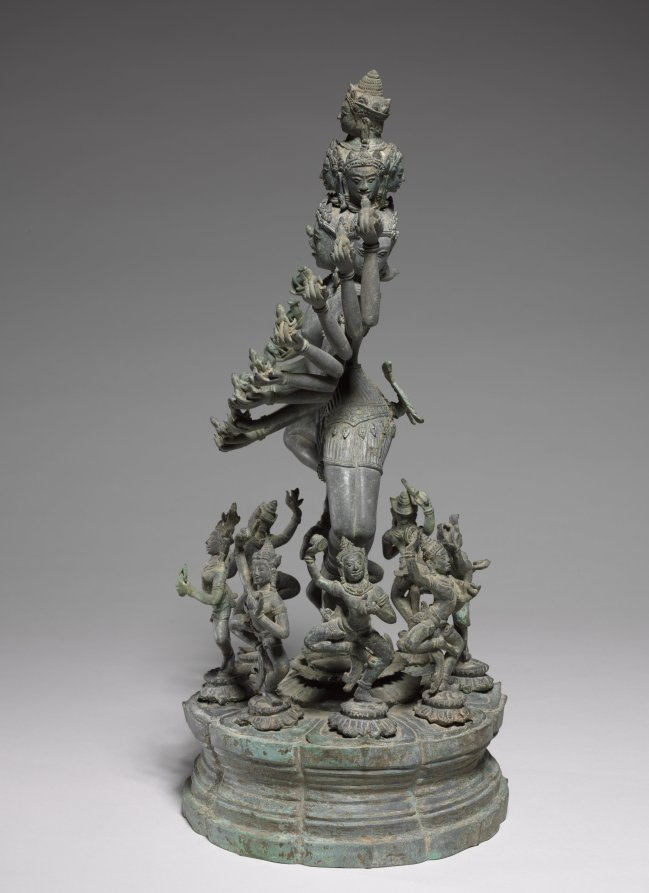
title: Hevajra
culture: Northeastern Thailand, former kingdom of Angkor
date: c. 1200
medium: Bronze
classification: Sculpture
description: Hevajra was an important figure signaling the practice of Buddhist rituals. King Jayavarman VII placed particular emphasis on Hevajra during consecration rituals and set up a colossal stone sculpture of dancing Hevajra at the east gate of his fortified city in the Khmer capital at Angkor. In the Cambodia of Jayavarman VII, tantric Buddhism became public and widespread, practiced together with other more mainstream forms of Buddhism, Hinduism, and ancestor worship. The iconography of Hevajra is described in detail in a text that bears his name, the Hevajra-tantra, first composed in India probably in the 800s. Hevajra has eight heads, sixteen arms, and four legs. His left hands hold images of Indic gods; wealth, death, sun, moon, fire, wind, water, and earth. In his right hands are animals: bull, lion, human, cat, camel, sheep, horse, and elephant. They all sit in skull cups, objects also used in tantric rituals. He dances on a corpse that embodies ignorance and is surrounded by eight yoginis who dance triumphantly in a ring around him. Yoginis functioned as intercessors between human practitioners and enlightened beings. Many bronze images of Hevajra were made during the reign of Jayavarman VII, but few survive in as pristine condition as this example. According to scientific analysis and curatorial reports, this sculpture survived in a clay vessel submerged in water, which accounts for its high tin content and unusual gray patina. Samples from the clay core reveal the presence of the mineral feldspar, a characteristic of clay from the Isaan plateau, on the other side of the mountain range not far from Banteay Chhmar, in present-day Thailand.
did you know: Hevajra, the Tantric Buddhist deity who personifies Enlightenment, dances vigorously to symbolize the human soul's liberation from the snare of existence.